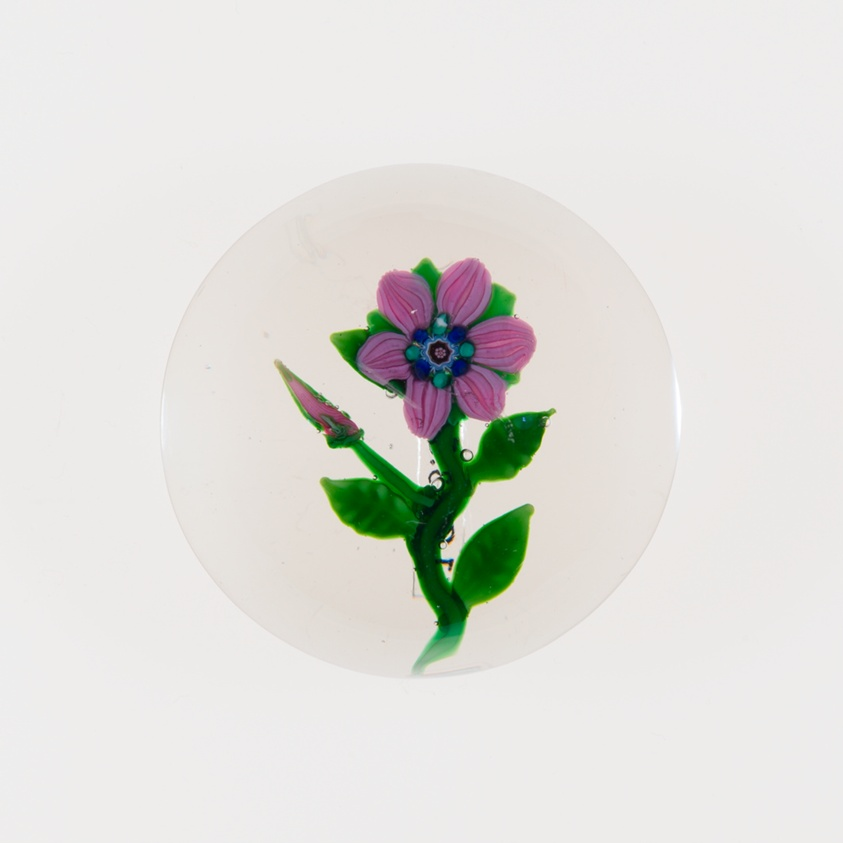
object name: Glass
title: Paperweight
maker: Clichy Glassworks (Cristalleries de Clichy); Clichy, France, 1837-1885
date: c. 1845/60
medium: Glass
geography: France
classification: paperweight; glass